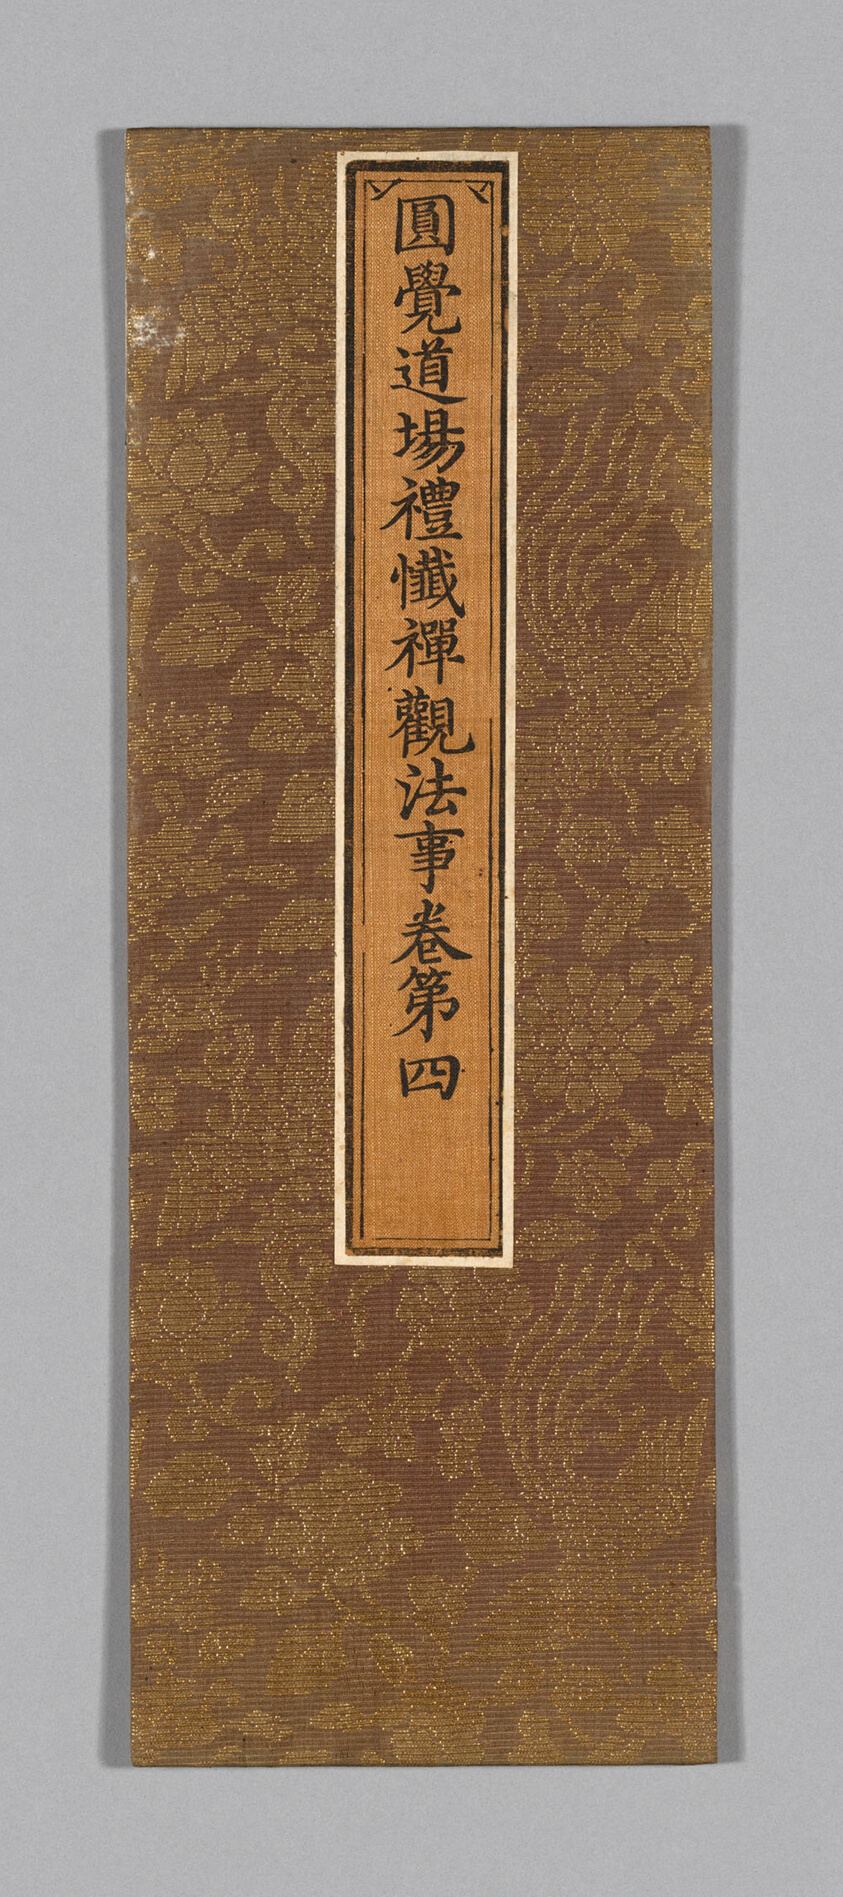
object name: Textile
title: Sutra Cover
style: ming, Chinese (culture or style), East Asian, asian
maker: China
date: Ming dynasty (1368–1644), c. 1590's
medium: Silk and gold-leaf-over-lacquered-paper strip, gauze weave with supplementary patterning wefts; label: silk, plain weave; painted with ink; glued to paper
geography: China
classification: textile; weaving